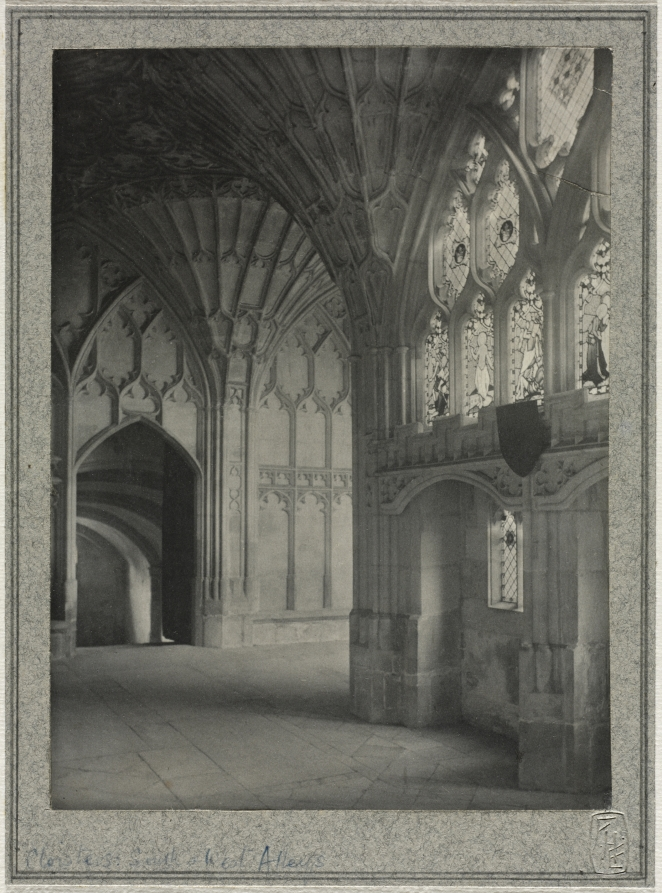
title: Gloucester Cathedral - Cloisters: South and West Alleys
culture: England, 20th century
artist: Frederick H. Evans (British, 1853–1943)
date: c. 1900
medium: platinum print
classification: Photograph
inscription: Written in blue ink on mount: "Cloisters: South & West Alleys"; in pencil on larger mount: " 'Gloucester Cathedral' "